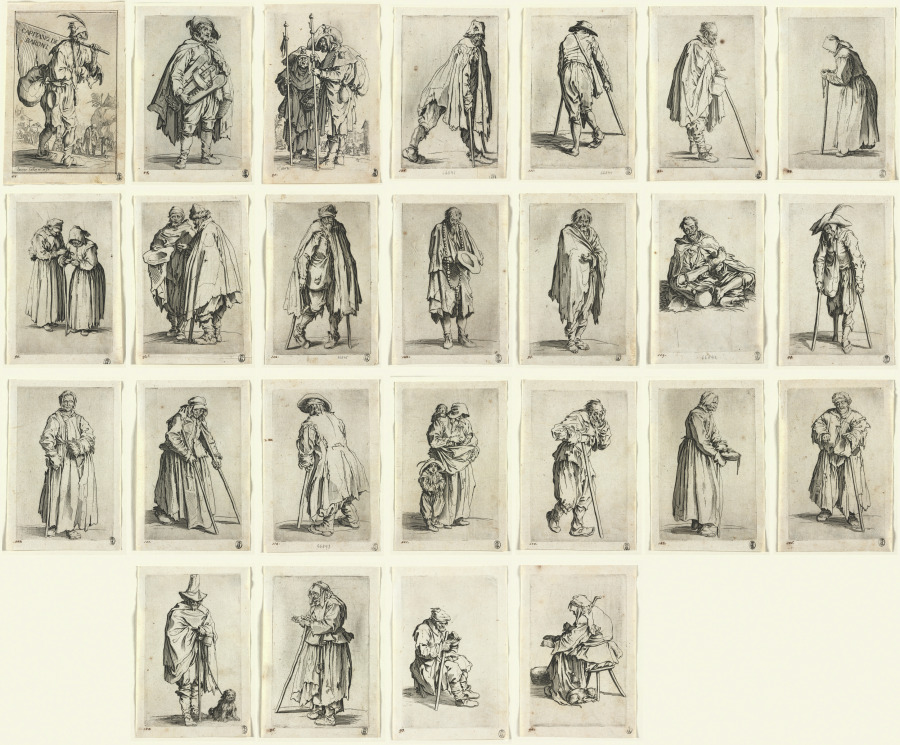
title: The Beggars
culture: France, 17th century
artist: Jacques Callot (French, 1592–1635)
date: c. 1623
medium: etching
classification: Print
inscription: Inscribed lower left in pen and brown ink: "88."